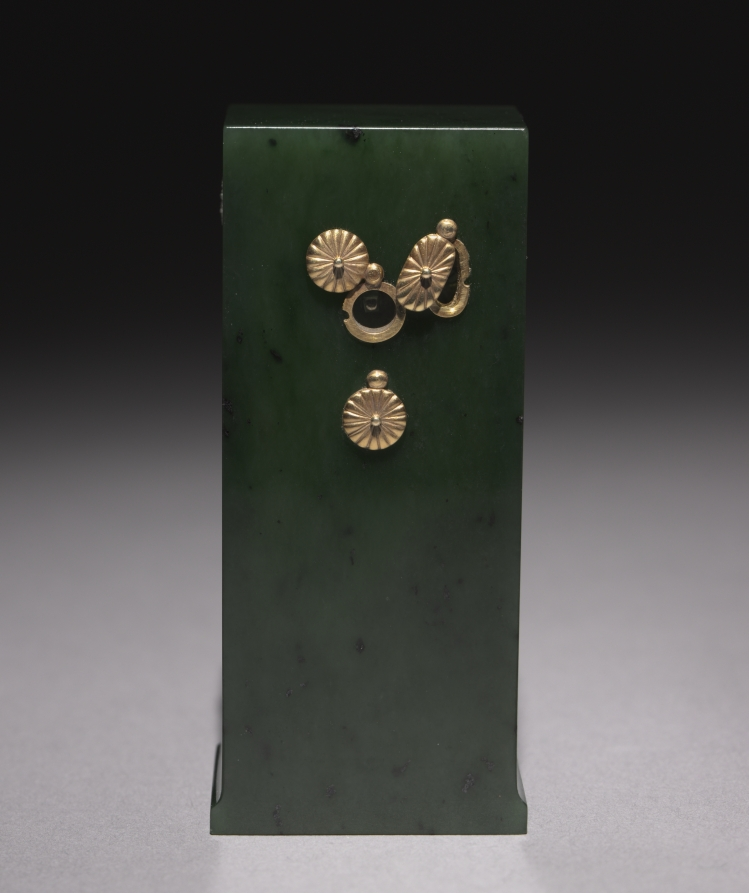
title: Clock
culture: Russia, St. Petersburg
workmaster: Henrik Wigström (Russian, 1862–1923)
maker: House of Fabergé (Russian, 1842–1918)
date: 1908–17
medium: nephrite, gold, enamel, diamonds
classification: Timepiece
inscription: 72, Kokoshnik, lower case alpha in script [assay mark for St. Petersburg, 1908-26]; 72; Fabergé; H.W. [initials of workmaster Henrik Wigström]; 22681 scratched; NS/15P scratched.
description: The use of Russian hardstones in creating precious objects became a hallmark of design from the House of Fabergé. Easily carved, these minerals were sourced largely from the western region surrounding the Ural Mountains. Fabergé's workmasters used colorful stones such as agate, lapis lazuli, rock crystal, rhodonite, and nephrite (jade), seen here in this small desk clock, to create and embellish flower studies, animal figures, and all manner of luxurious accessories.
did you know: The face of this small luxurious desk clock features tiny pink enameled roses in place of the customary numbers along with hour and minute hands paved in diamonds.